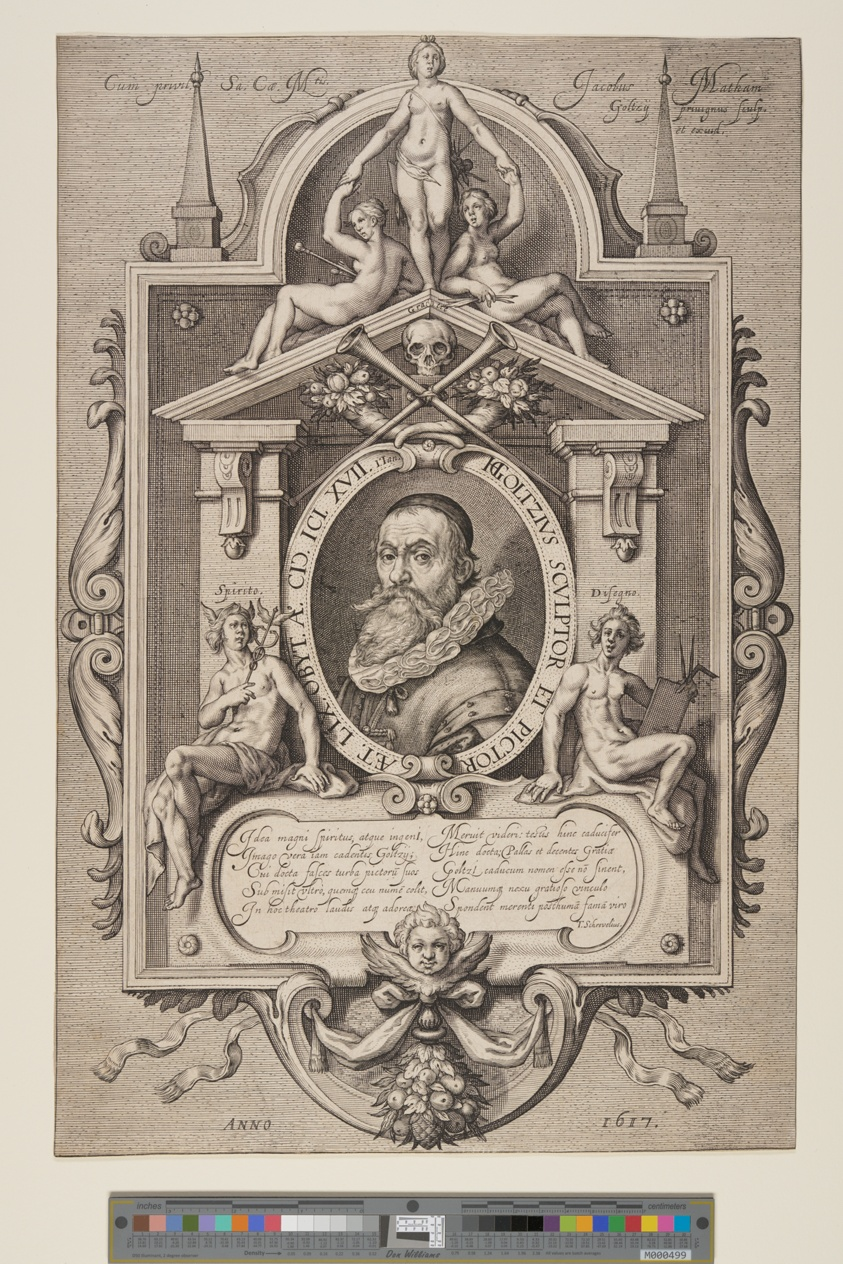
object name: Print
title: Hendrick Goltzius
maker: Jacob Matham (Dutch, 1571–1631); after Hendrick Goltzius (Dutch, 1558–1617)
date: 1617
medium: Engraving on ivory laid paper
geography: Netherlands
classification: engraving; paper; print; prints and drawing